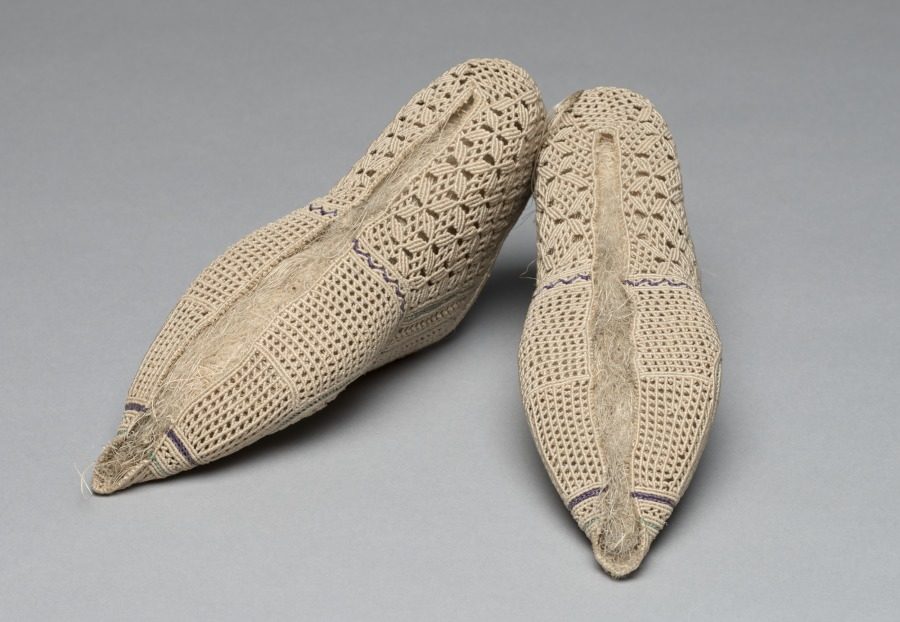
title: Pair of Shoes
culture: Philippines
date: 1850s-1920s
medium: Abacá fiber: macramé knotted lace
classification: Garment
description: Finely knotted abacá fibers form intricate geometric patterns in this small pair of shoes, likely created for display rather than for wear. Some sections are dyed, adding subtle tonal variation to the design. The macramé technique combined with local abacá suggests a colonial-era or early-20th-century hybrid craft, likely taught in a convent or school setting.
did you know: The shoes are unstitched at the bottom, suggesting they were never meant to be worn.